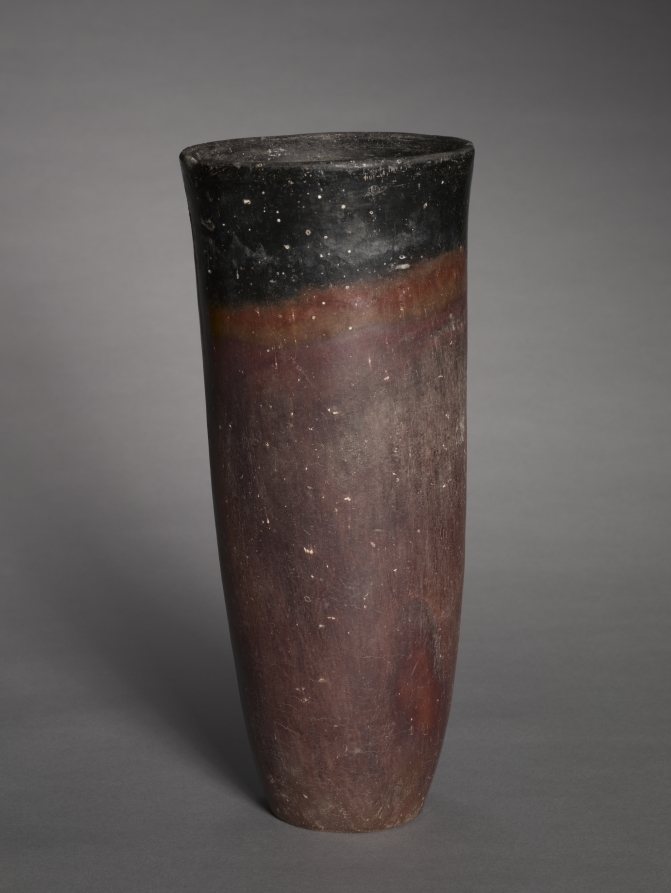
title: Black-Topped Beaker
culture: Egypt, Predynastic (5000–2950 BCE), Naqada I–IIb (3900–3300 BCE)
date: c. 4000–3500 BCE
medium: Nile silt pottery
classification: Vessels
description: Red polished vessels with black rims (known as black-topped red ware or B-ware) were the most common funerary pottery during the early Predynastic Period. The characteristic blackening of the rim was probably achieved by burying the mouth of the pot in the ashes of the kiln. The iron in the exposed part would then fire red while the covered area turned black.